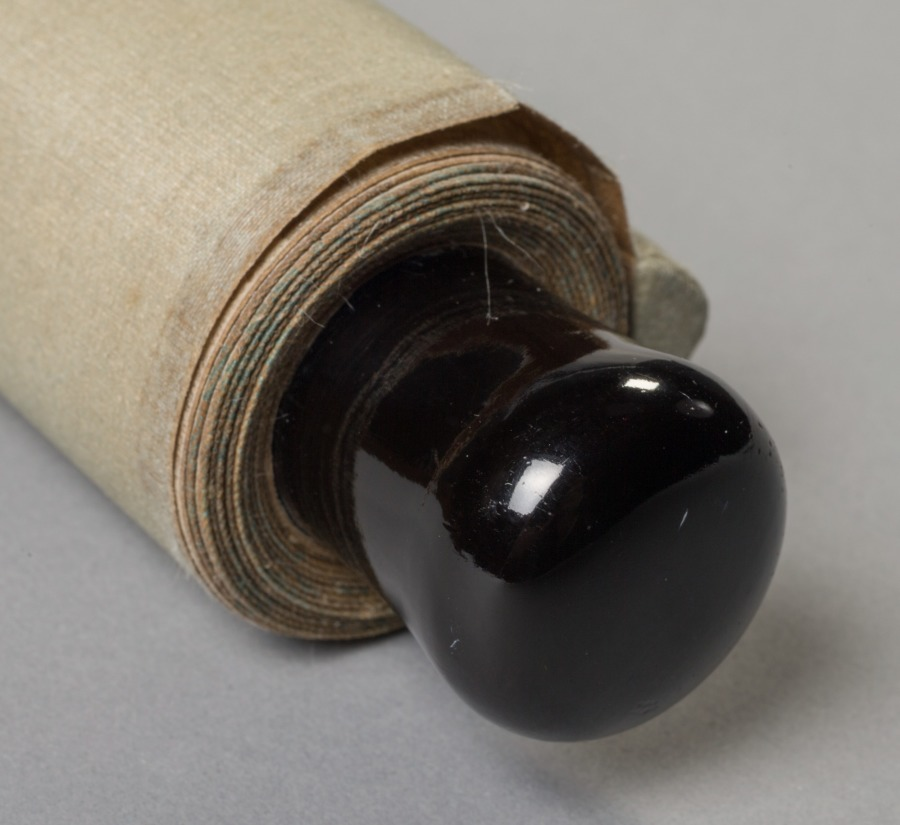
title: Mountains and Distant Boats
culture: Japan, Edo period (1615–1868)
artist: Nagasawa Rosetsu (Japanese, 1754–1799)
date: late 1700s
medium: hanging scroll; ink and slight color on paper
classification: Painting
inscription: Signed: 蘆雪; Sealed: 引裾